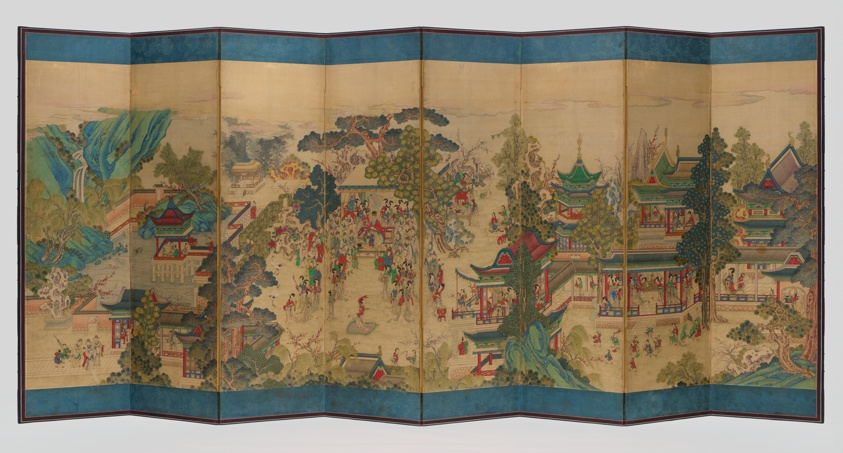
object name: Painting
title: Joyous Banquet of Guo Ziyi (곽분양행락도)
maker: Korea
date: Joseon dynasty (1392–1910), 19th century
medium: Ink and color on silk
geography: Korea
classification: screen; painting; asian art